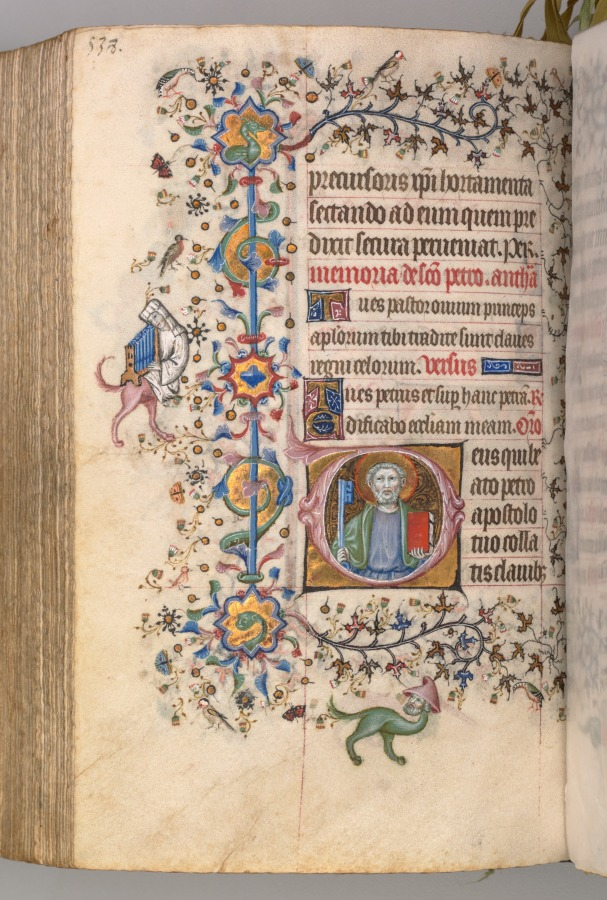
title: Hours of Charles the Noble, King of Navarre (1361-1425): fol. 263r, St. Peter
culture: France, Paris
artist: Master of the Brussels Initials and Associates (French)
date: c. 1405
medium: ink, tempera, and gold on vellum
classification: Bound Volume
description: This precious volume was obviously highly prized by its owner, the French-born King of Navarre, who had his coat of arms painted on no less than twenty folios. Rather than directly commissioning this manuscript from a specific workshop, it seems that Charles the Noble acquired his book of hours -- perhaps ready-made for the luxury market -- while on a trip to Paris in 1404-05. A collaborative effort, six painting styles are evidenced within the pages of this codex, those of two Italians, two Frenchmen, and two Netherlanders. The painter who was responsible for the planning and decoration of the book, and who produced seventeen of the large miniatures, was a Bolognese artist known as the Master of the Brussels Initials. His principal assistant, responsible for most of the borders, was a Florentine who signed his name "Zecho" da Firenze on folio 208 verso.